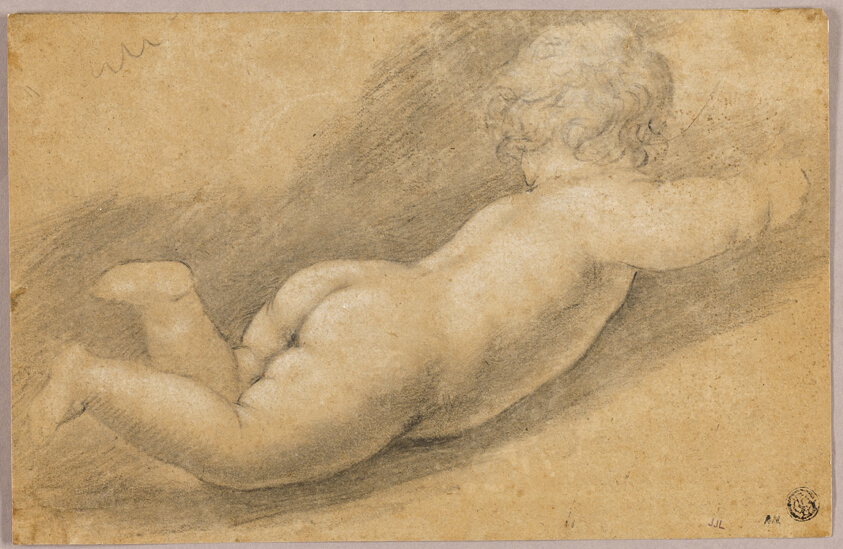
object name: Drawing and Watercolor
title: Back View of Putto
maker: Circle of Petr Brandl (Czech, 1668-1735); or Annibale Carracci (Italian, 1560-1609)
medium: Black chalk, heightened with white chalk, on tan laid paper, laid down in ivory laid paper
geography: Italy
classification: chalk; paper; drawings (visual works); prints and drawing